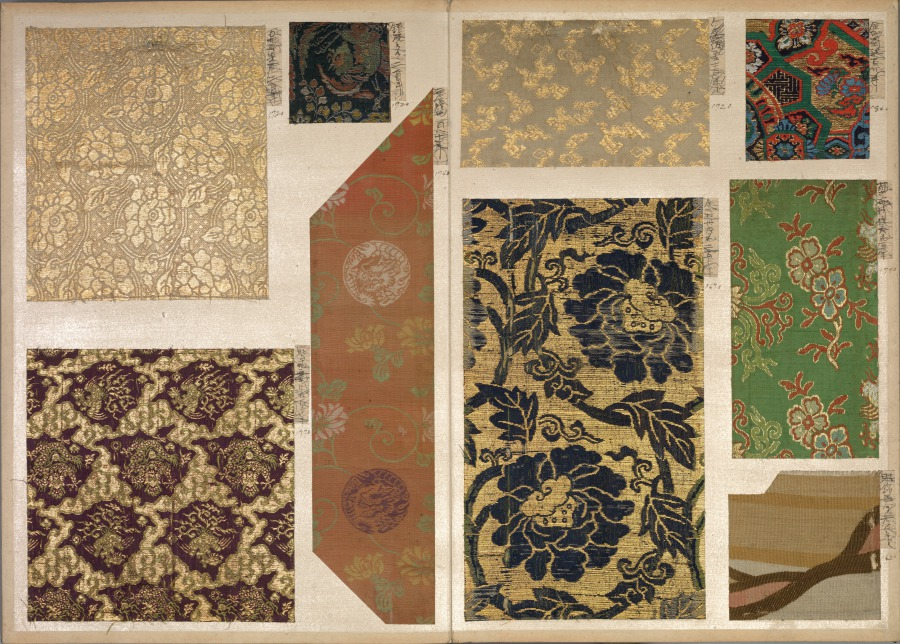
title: Album of Textile Samples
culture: Japan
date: 1790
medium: silk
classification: Textile